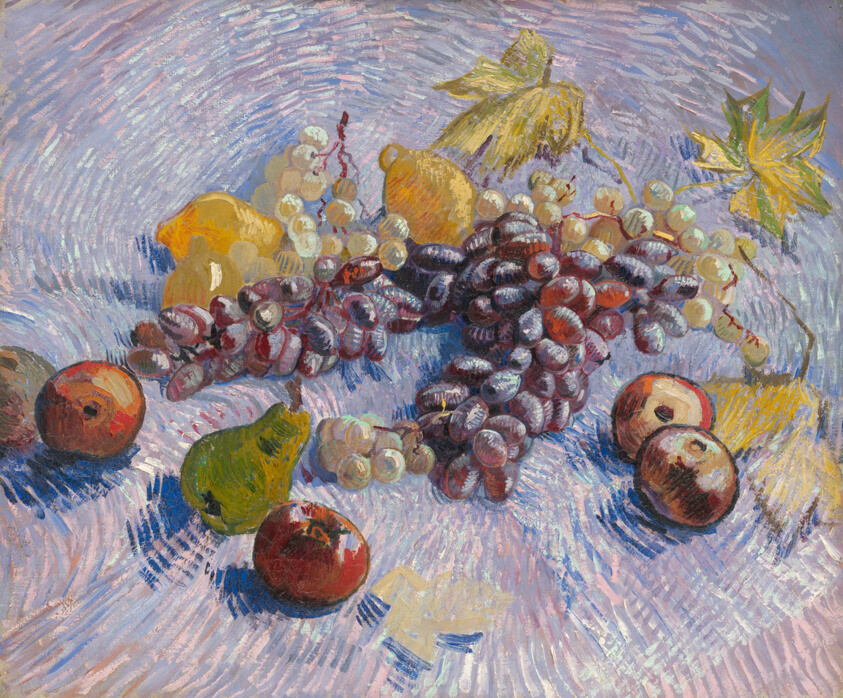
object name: Painting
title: Grapes, Lemons, Pears, and Apples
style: Post-Impressionism, 19th century, nineteenth century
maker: Vincent van Gogh (Dutch, 1853–1890)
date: 1887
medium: Oil on canvas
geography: Paris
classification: oil on canvas; still life; dutch; paint; oil paintings (visual works); painting; european painting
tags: still life, apples, blue (color), fruit, grapes, green (color), leaf, leaves, lemons, pears, pink (color), purple (color), red (color), food